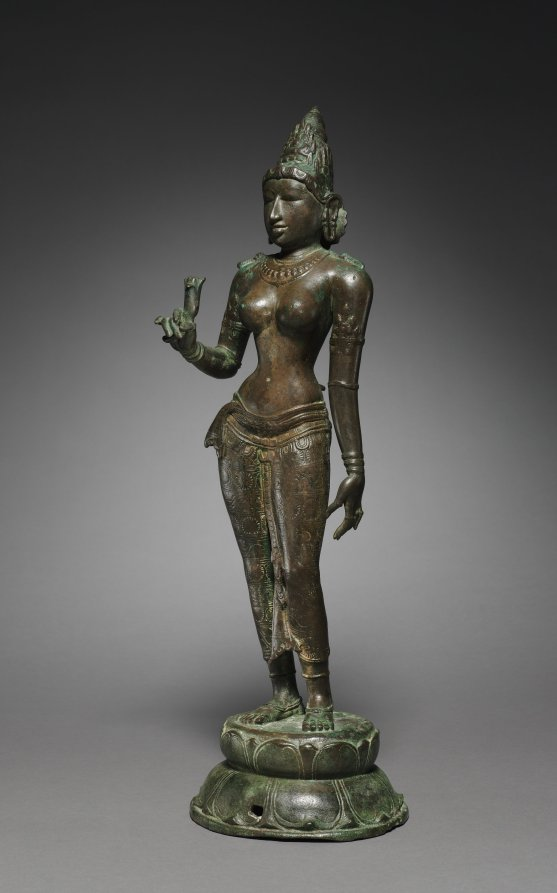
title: Goddess Holding a Lotus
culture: South India, Tamil Nadu, Chola period (900-13th Century)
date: c. 950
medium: bronze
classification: Sculpture